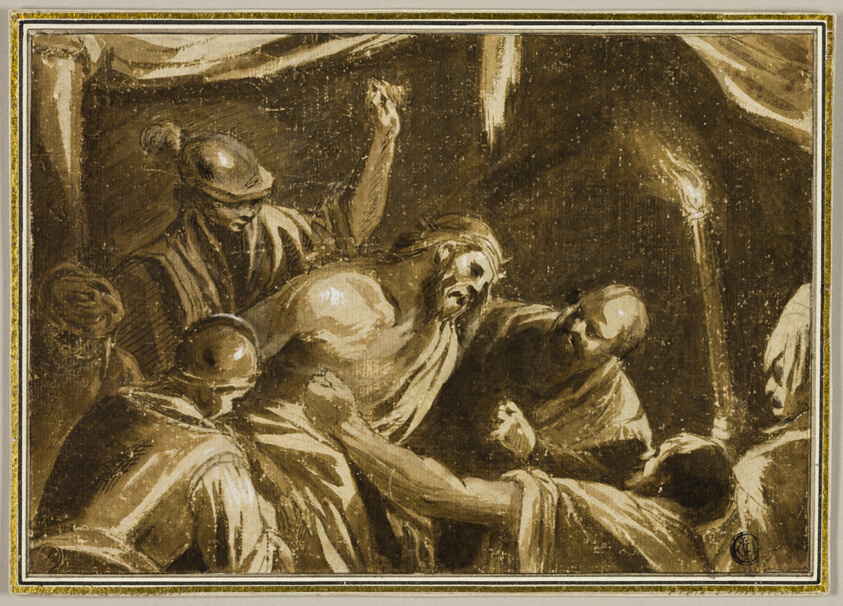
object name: Drawing and Watercolor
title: Christ Crowned with Thorns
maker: After Jacopo Bassano; Italian, c. 1510-1592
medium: Pen and brown ink with brush and brown wash, heightened with white gouache, over traces of black chalk, on cream laid paper, laid down on ivory laid paper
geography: Italy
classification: ink with wash; drawings (visual works); prints and drawing